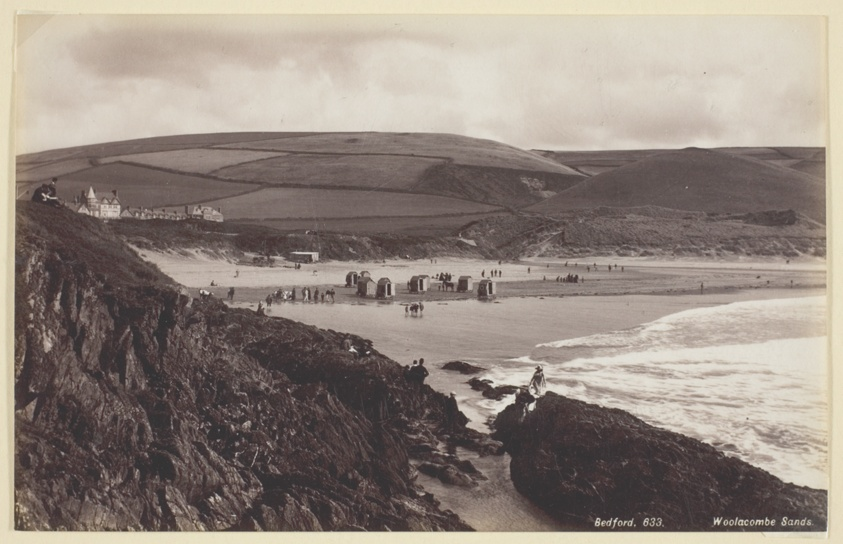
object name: Photograph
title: Woolacombe Sands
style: 19th century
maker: Francis Bedford (English, 1816–1894)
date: 1860/94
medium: Albumen print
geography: England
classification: albumen silver print; photographic process; photography; photograph